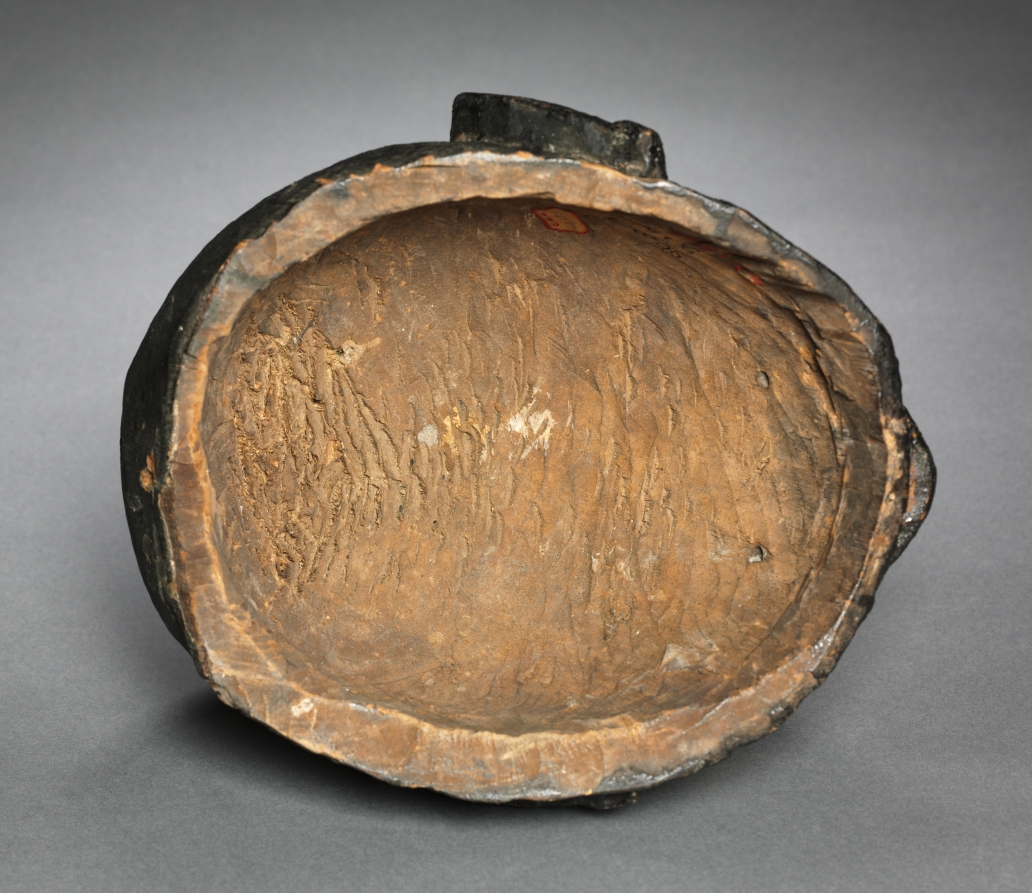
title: Mask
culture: Africa, West Africa, Nigeria, Yorùbá-style maker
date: c. 1910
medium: Wood and paint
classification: Mask